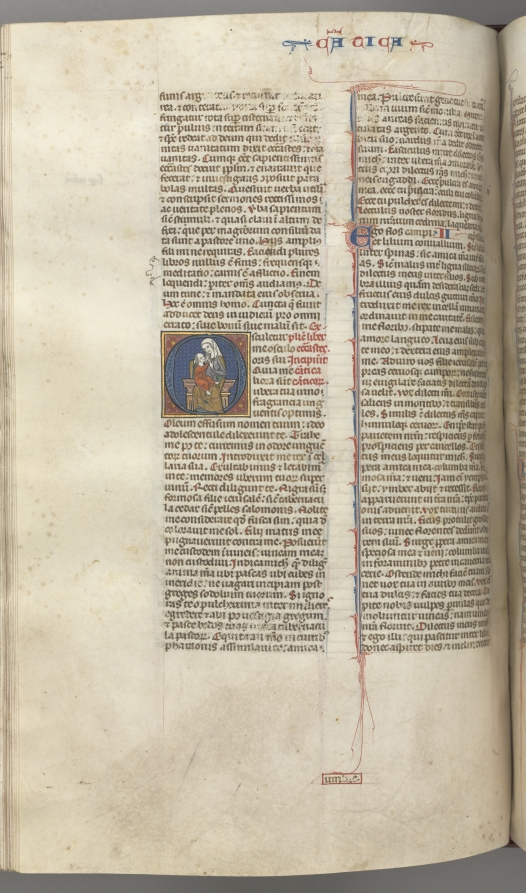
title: Fol. 249v, Song of Songs, historiated initial O, theVirgin and Child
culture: Southern France, Toulouse(?), 13th century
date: c. 1275–1300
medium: ink, tempera and gold on vellum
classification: Bound Volume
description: Biblical manuscripts were highly prized and important possessions of churches, monasteries, cathedral schools, and universities throughout medieval Europe. The biblical texts were known as the vulgate, the translations made by Saint Jerome in the fourth century from Hebrew and Greek into Latin, which became the definitive and official Latin version of the Roman Church. In the 13th century, the bible was, for the first time, produced as a single volume with an officially sanctioned sequence to its books and chapters as illustrated by this example. The very extensive decoration of this bible is arranged hierarchically to indicate the relative importance of the various texts so that full or almost full-page initials mark the openings of the first prologue, Genesis, and the first Gospel; historiated initials mark the beginning of each book and illuminated initials mark the Prologues.